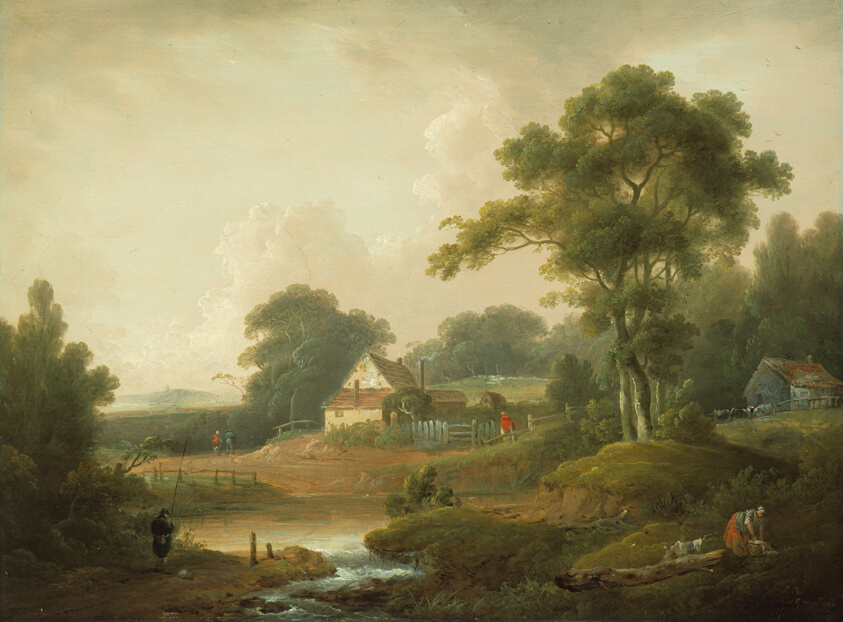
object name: Painting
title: Landscape with Fisherman and Washerwoman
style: 18th Century, nineteenth century, 19th century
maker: John Rathbone (British, c. 1750–1807); George Morland (British, 1763–1804)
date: 1790/1800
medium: Oil on panel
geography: England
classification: oil on panel; paint; oil paintings (visual works); british; painting; european painting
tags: landscape, trees, figures, animals, men, woman, fences, building, buildings, water, streams, rural life, nature